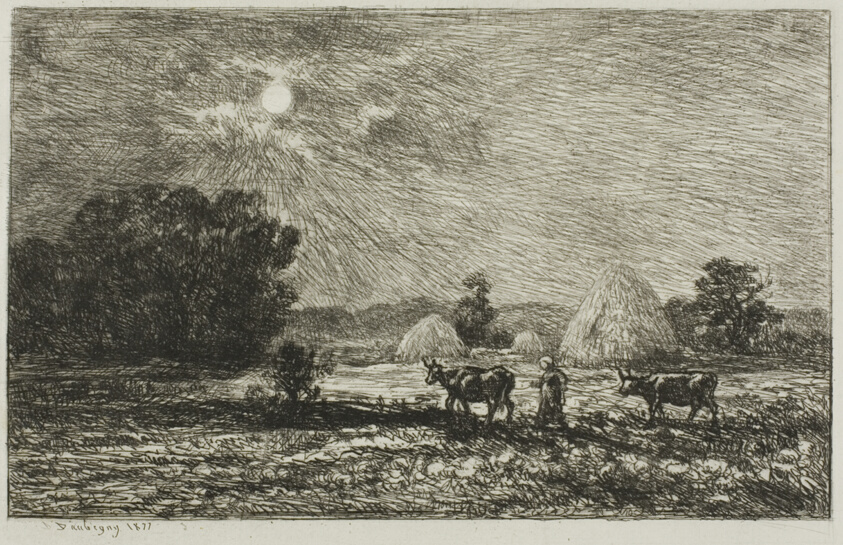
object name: Print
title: Moonlight at Valmondois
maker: Charles François Daubigny (French, 1817-1878)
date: 1877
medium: Etching and drypoint on white laid paper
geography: France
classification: etching; print; prints and drawing